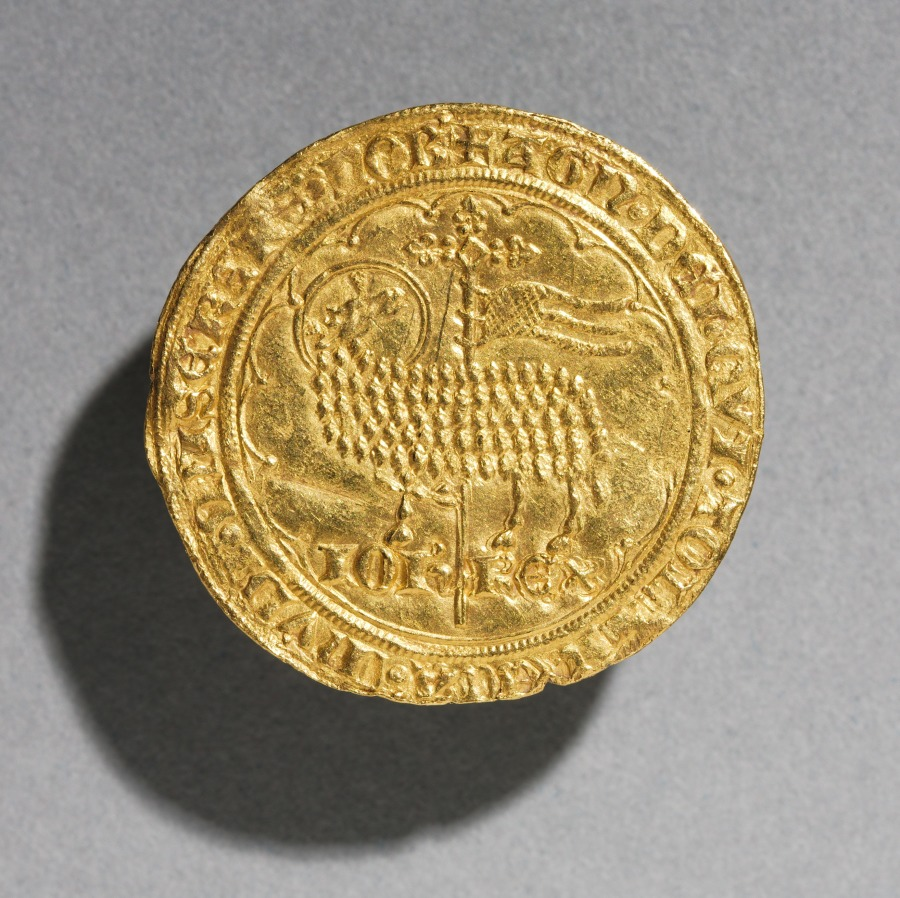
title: Mouton d'Or of King Jean le Bon of France, 1350-1364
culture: France, Gothic period, 14th century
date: 1350–1364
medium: gold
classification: Coins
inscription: haloed Paschal Lamb, holding a staff with a floriate cross and framed with a near-circle of single arches and inscribed: AGN.DEI.QVI.TOLL.PECA.MVDI.MISERERE.NOB; inscription directly below the Pascal lamb: IOH.REX.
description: Because this gold coin represents the Paschal Lamb, a symbol of Christ, on one of its faces, it is known as a "Golden Sheep"--Mouton d'Or in French.